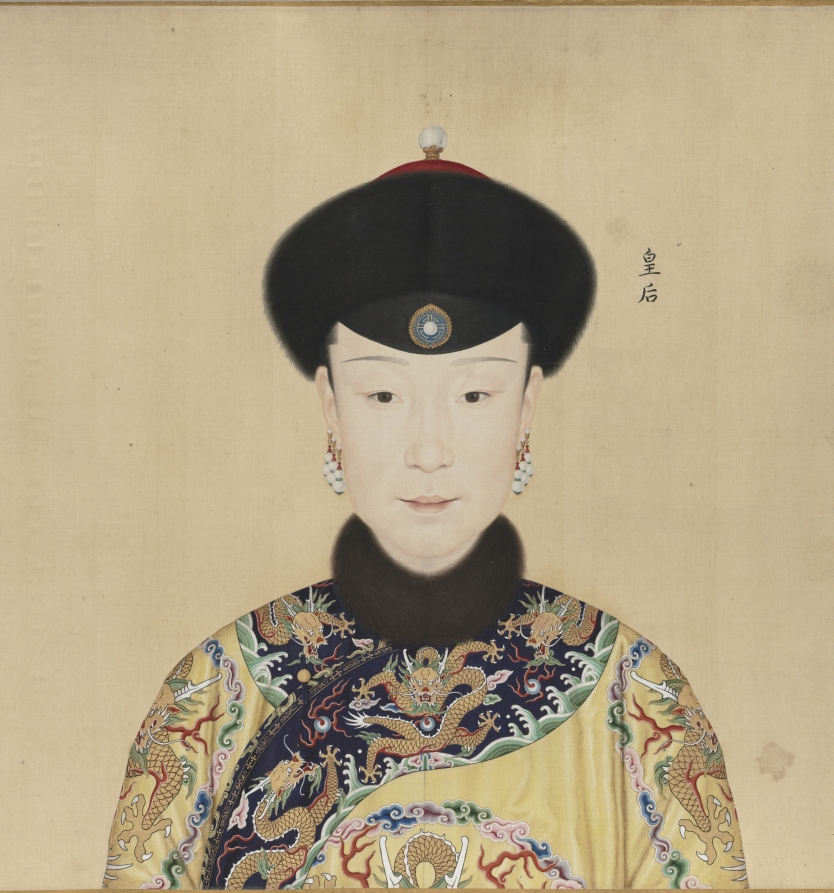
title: Portraits of the Qianlong Emperor and His Twelve Consorts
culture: China, Qing dynasty (1644–1911), Qianlong reign (1736–95)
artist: Giuseppe Castiglione (Italian, 1688–1766)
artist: and others (Chinese)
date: 1736–70s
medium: Handscroll; ink and color on silk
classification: Painting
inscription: 9 seals of the Qianlong emperor (r. 1736–95).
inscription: The eighth month, first year of Qianlong [1736] 乾隆元年八月吉日. The Empress (Xiaoxian) 皇后 (1712–1748), The Guifei (Huixian) 貴妃 (?-–1745), Chunfei 純妃 (1713–1760), Jiafei 嘉妃 (?–1755), Lingfei 令妃 (1727–1775), Shufei 舒妃 (1728–1777), Qingbin 慶嬪 (1724–1774), Yingbin 穎嬪 (1731–1800), Xinbin 忻嬪 (?–1764), Dunfei 惇妃 (1746–1806), Xunfei 順妃 (1749–1788), Shunbin 循嬪 (?–1797).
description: This portrait shows the Qianlong emperor at 26, in the first year of his reign. His likeness is followed by portraits of the empress and eleven consorts. Their portraits document the appearances of the court women around the time when they received their respective imperial titles, which occurred at different stages of the emperor's life. The first three portraits were done by the Jesuit (Roman Catholic) missionary artist Giuseppe Castiglione, whereas the later ones were by Chinese court painters. Formal portraiture contributed to the affirmation of status and construction of role and identity. This scroll served as both familial documentation and a "mind picture" of the Qianlong emperor, suggesting that his constructed image of emperorship was inseparable from concepts of self and family. It was stored in a carved red lacquer box bearing the original painting title Mind Picture of a Well-Governed and Tranquil Reign (see CMA 1969.32).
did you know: Lingfei 令妃 (1727–1775), the first consort depicted in the maroon or “incense-colored" 香色 robe, was the mother of six of Qianlong’s children, including the future Emperor Jiaqing.